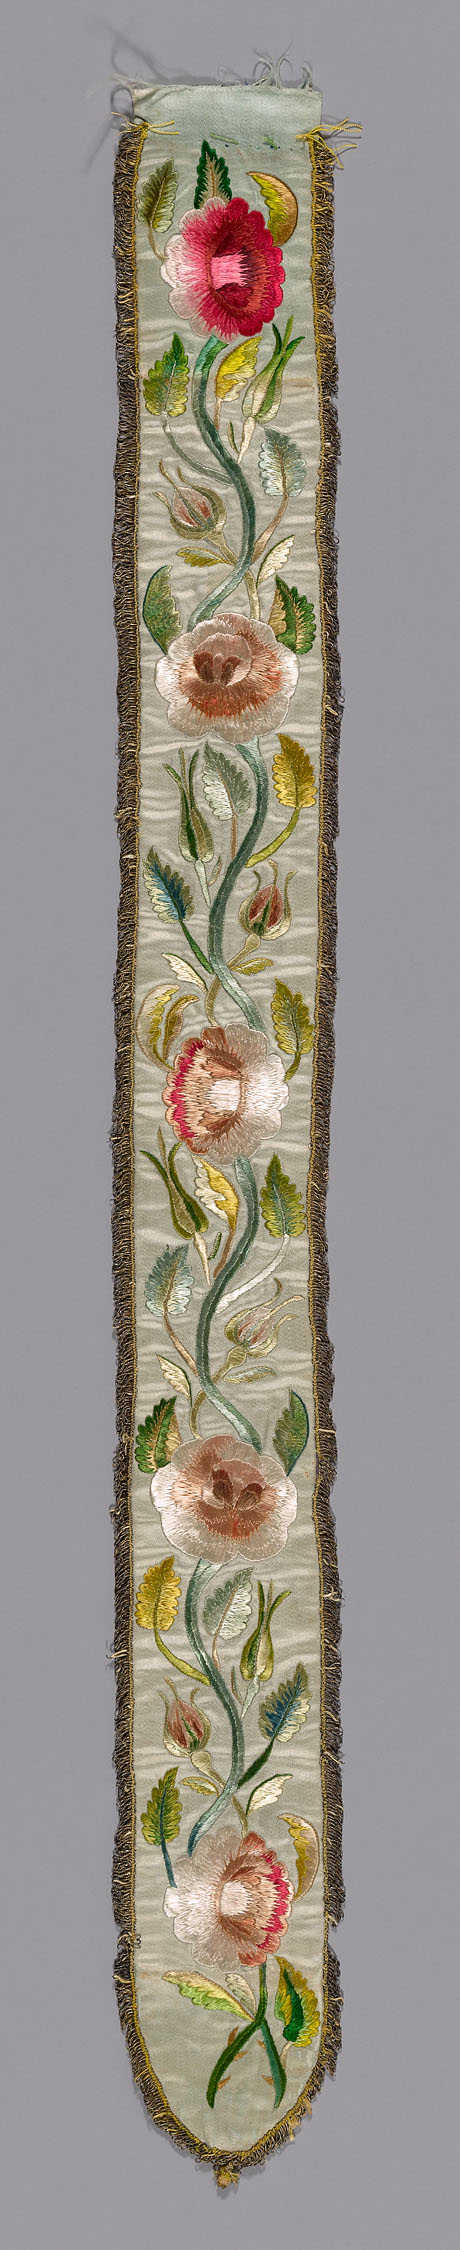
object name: Textile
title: Border Fragment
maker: France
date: 1775/1825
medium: Silk, satin weave; embroidered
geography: France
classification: textile; needlework (visual works)